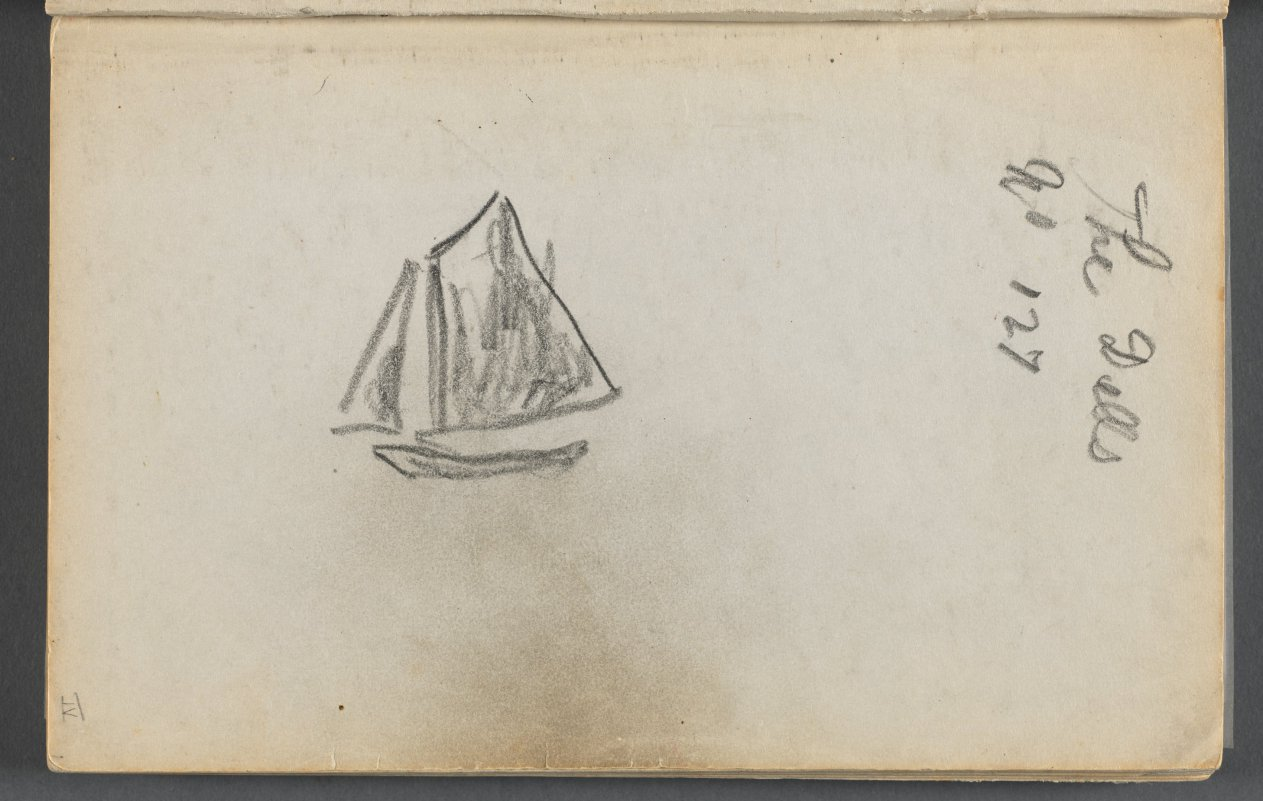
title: Sketchbook, The Dells, N° 127, page 001:Sailboat "The Dells"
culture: America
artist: Maurice Prendergast (American, born Newfoundland [now Canada], 1858–1924)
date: c. 1919–1921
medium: graphite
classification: Bound Volume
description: This sketchbook contains 59 pages of graphite drawings and 16 watercolors made at various locations on Cape Ann, Massachusetts.